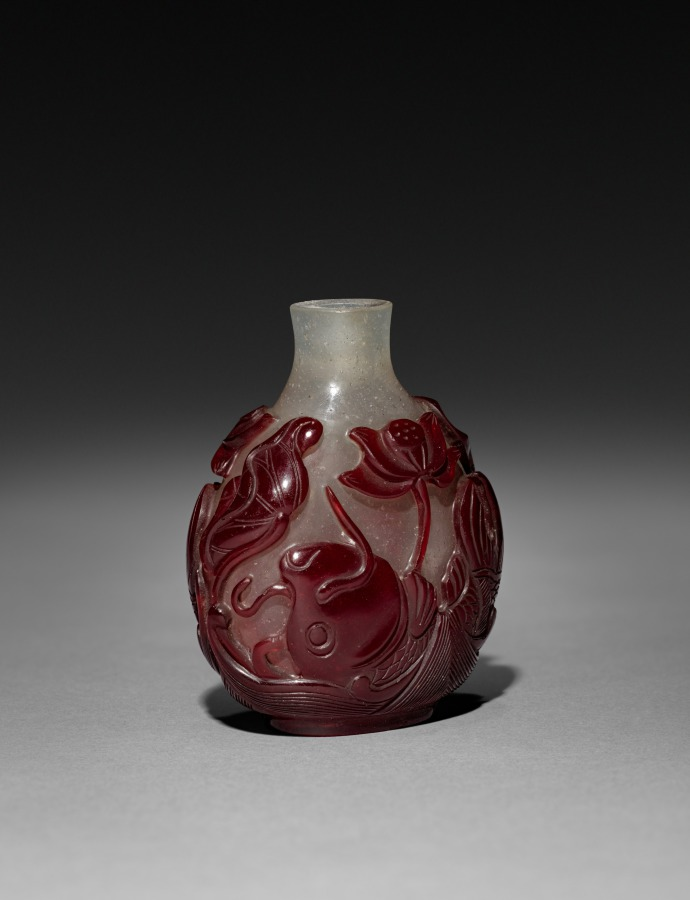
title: Snuff Bottle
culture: China, Qing dynasty (1644-1911)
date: 1644–1911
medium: glass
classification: Glass